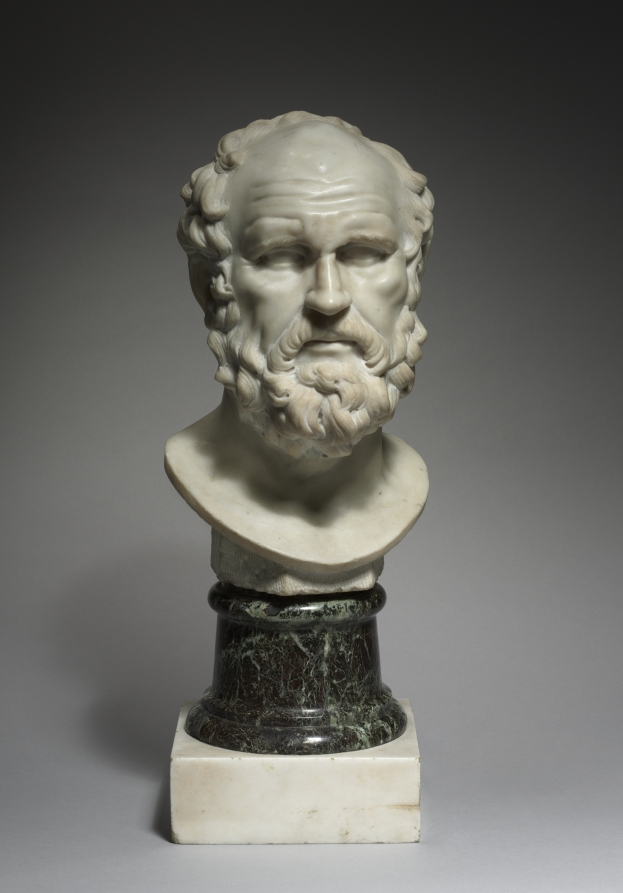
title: A Philosopher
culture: France, made in Rome, 17th century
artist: Pierre Puget (French, 1620–1694)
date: 1662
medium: marble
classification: Sculpture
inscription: inscribed: "P. Puget S. Romae / 1662."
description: Puget traveled to Rome in the early 1660s, where he closely studied ancient busts in the collections of wealthy nobles. Although inspired by Greek and Roman depictions of individual philosophers, orators, and writers, Puget created a generalized image of this type—a mature, bearded man with a furrowed brow— rather than a portrait of a particular historical figure. The rounded forms of the flesh and individual locks of hair are particularly characteristic of 17th-century baroque taste.